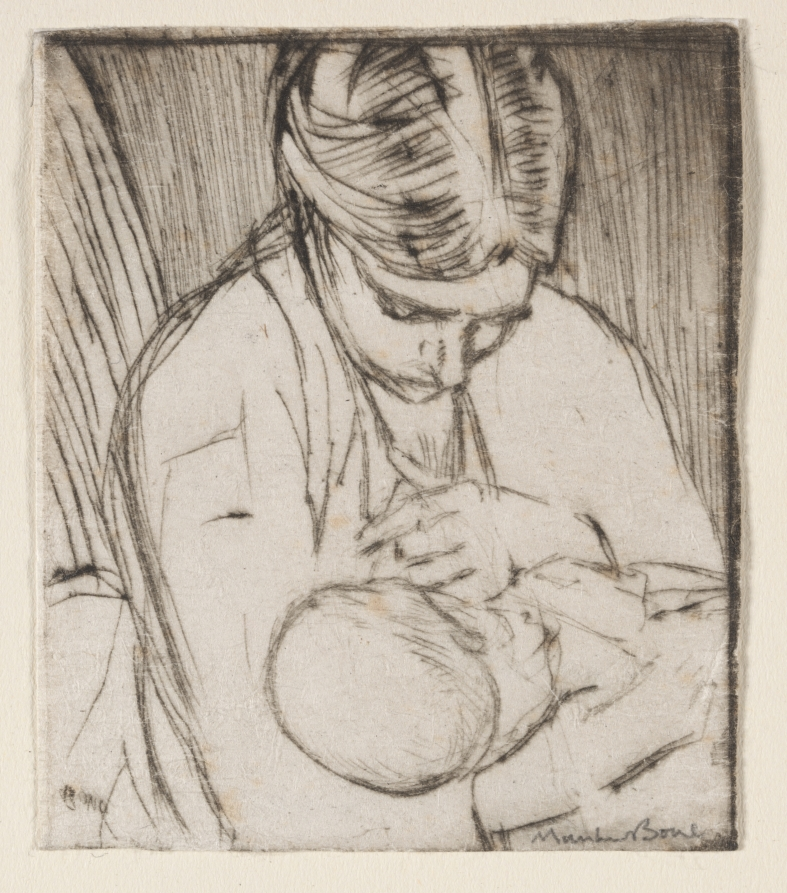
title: Gertrude and Stephen, No. 6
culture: England, 20th century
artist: Muirhead Bone (British, 1876–1953)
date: 1905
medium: drypoint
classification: Print